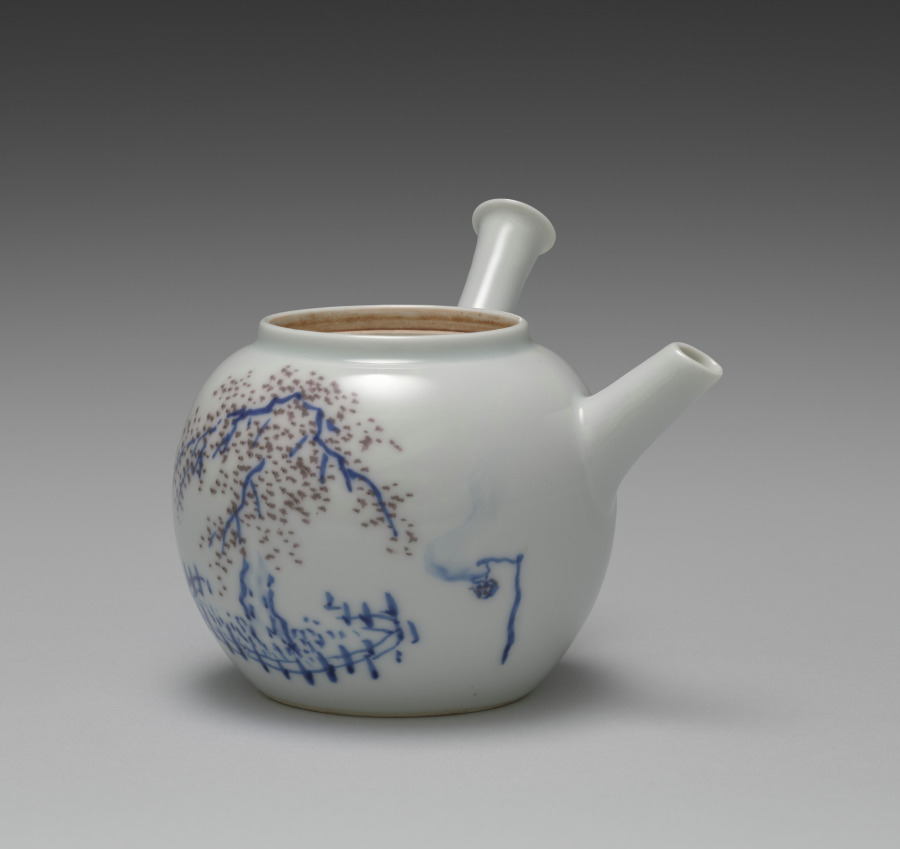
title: Teapot with Cherry at Night in Gion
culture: Japan, Meiji period (1868–1912)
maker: Seifū Yohei III (Japanese, 1851–1914)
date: 1893–1914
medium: Porcelain with underglaze blue and iron oxide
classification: Ceramic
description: This side-handled sencha teapot with the cherry tree has a nearly spherical shape, and its recessed lid has an ovoid knob. It has both blue and a purplish brown under the glaze for the blossoms and embers on one side, and the vertical calligraphy identifies the tree as a cherry tree at night in the Gion area of Kyoto. To the right of the tree, smoke billows from a small lantern fire in a basket suspended on a post. In terms of collecting history, a paper inserted into the box of Teapot with Cherry at Night in Gion is of interest. It is a flyer for Yamamoto Shōseidō, a shop (no longer extant) that sold fine Kyoto ceramics in Osaka.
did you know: This teapot features the Japanese theme of a blossoming cherry tree in the Gion area of Kyoto in underglaze blue and brown.